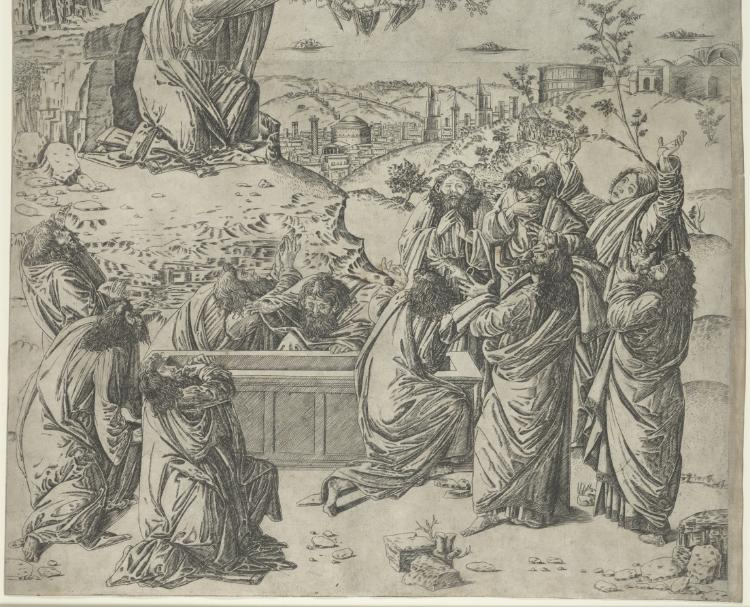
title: The Assumption of the Virgin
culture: Italy, Florence, 15th century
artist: Francesco Rosselli (Italian, 1448-about 1513)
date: c. 1495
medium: engraving printed on two sheets from two plates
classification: Print